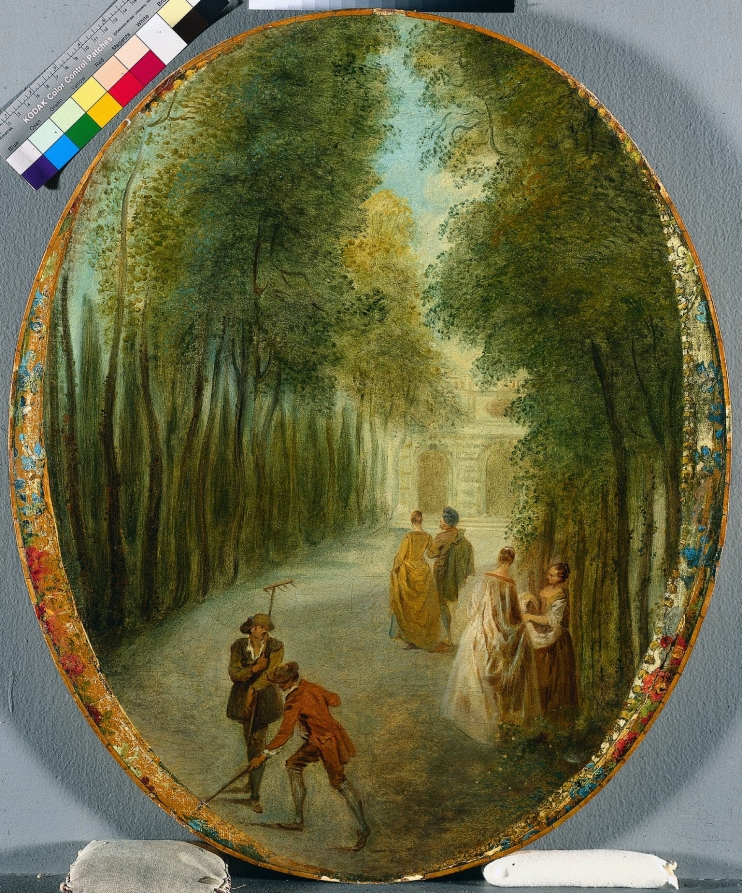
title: Spring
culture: France, 18th century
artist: Jean-Baptiste Pater (French, 1695–1736)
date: c. 1720–36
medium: oil on canvas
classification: Painting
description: Spring and Summer are two scenes from a four-season series. These landscapes were originally a part of a screen or a decorative panel, indicated by their floral borders and oval shape. The setting of Spring is believed to be the grounds of Montmorency, the country estate of Pierre Crozat (1665–1740), a wealthy financier and art collector in early eighteenth-century Paris. Summer counters Spring's aristocratic leisure by depicting rural labor. Befitting the work's decorative origins, however, Pater's scene belongs to the tradition of the timeless pastoral. More idyllic than a statement about class differences, the reapers peacefully gather sheaves of wheat as shepherds rest with their flocks in the foreground.